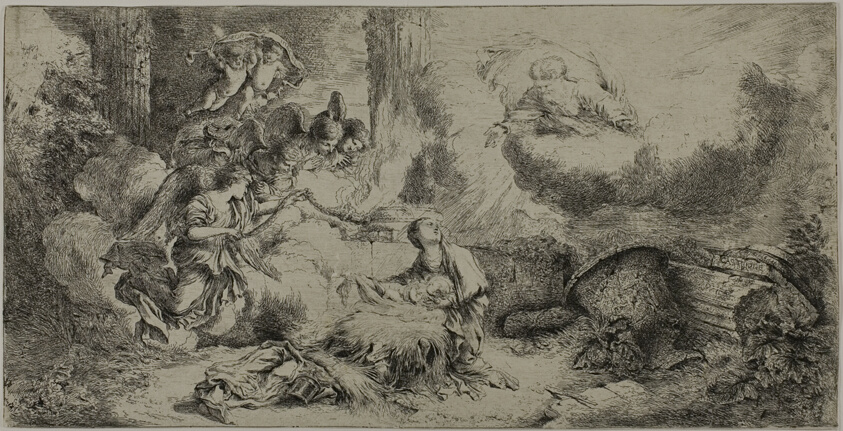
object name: Print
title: The Nativity with God the Father and Angels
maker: Giovanni Benedetto Castiglione (Italian, 1609-1664)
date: after 1647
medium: Etching on ivory laid paper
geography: Italy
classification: print; prints and drawing